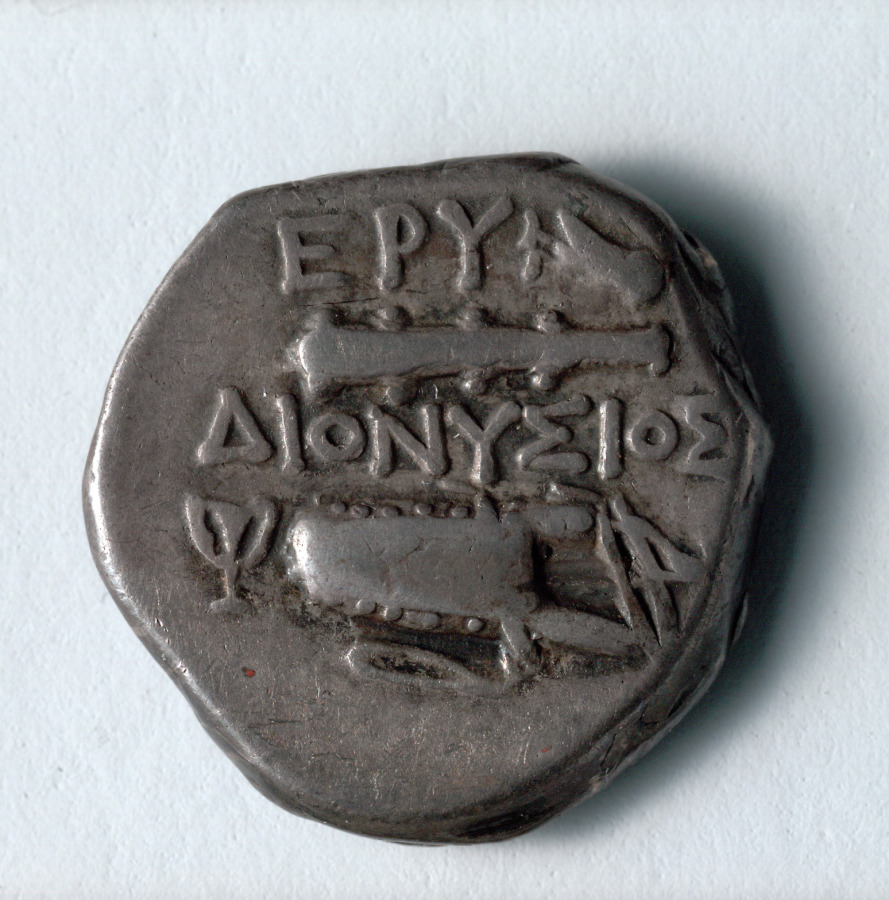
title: Drachm: Club, Bow Case, Kantharos (reverse)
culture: Greek, minted at Erythrai (Ionia)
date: 387–300 BCE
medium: silver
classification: Coins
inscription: ΕΡΥ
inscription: ΔΙΟΝΥΣΙΟΣ